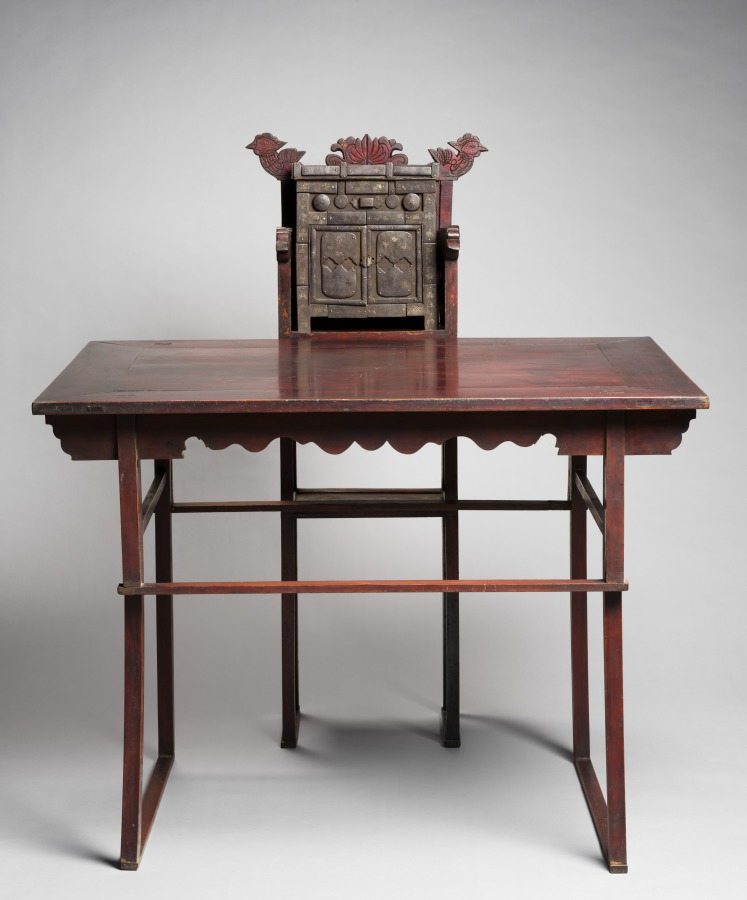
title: Spirit House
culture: Korea, Joseon dynasty (1392–1910)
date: late 1800s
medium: iron inlaid with silver and copper decoration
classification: Metalwork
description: This table, chair, and spirit house form a partial recreation of a memorial altar from the Joseon period. The spirit house and chair both include a number of auspicious symbols, including lotuses, conch shells, and chakra wheels. The spirit house would have been placed on the altar chair, and offerings would have been set out on the table for the memorial service. In ancestor veneration rituals, deceased parents or ancestors are sanctified as spirits who are believed to oversee their descendents. Three times a year, once at the lunar new year, once at the person’s death date, and once at the time of the mid-autumn festival, food would be placed on the table for the ancestors, including fruits, rice, meat, and rice wine. During these ceremonies the worshippers’ attitude was as reverential toward the objects meant to embody the ancestors’ spirits as that toward a living parent.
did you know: The belief in two types of souls, the spiritual and the corporeal, embodied the core concept of ancestor worship in traditional China and Korea. While the corporeal soul is believed to reside in the tomb, the spiritual soul, in the spirit house like this example, guards his or her decedents.